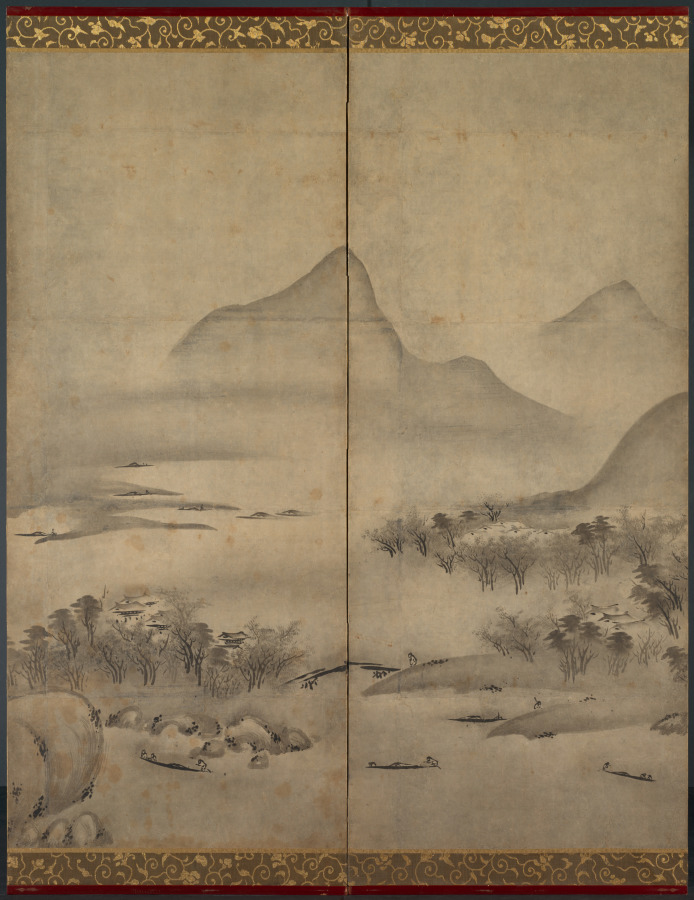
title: Moonlit Landscape (one of a pair)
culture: Japan, Muromachi period (1392–1573)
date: late 1500s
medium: six-panel folding screen, ink on paper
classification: Painting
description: This unsigned and unsealed composition includes imagery from the Eight Views of the Xiao and Xiang Rivers. Scanning the composition from right to left, four of the Eight Views subjects appear: sunset glow over a fishing village, returning sails off a distant shore, autumn moon over Lake Donting, and evening bell from a mist-shrouded temple. Not all the elements of the traditional Eight Views theme are here, but the artist suggests its literary presence by leading the viewer through a summer’s journey from one day to the next, aided, like the travelers in the landscape, by the light of the moon.